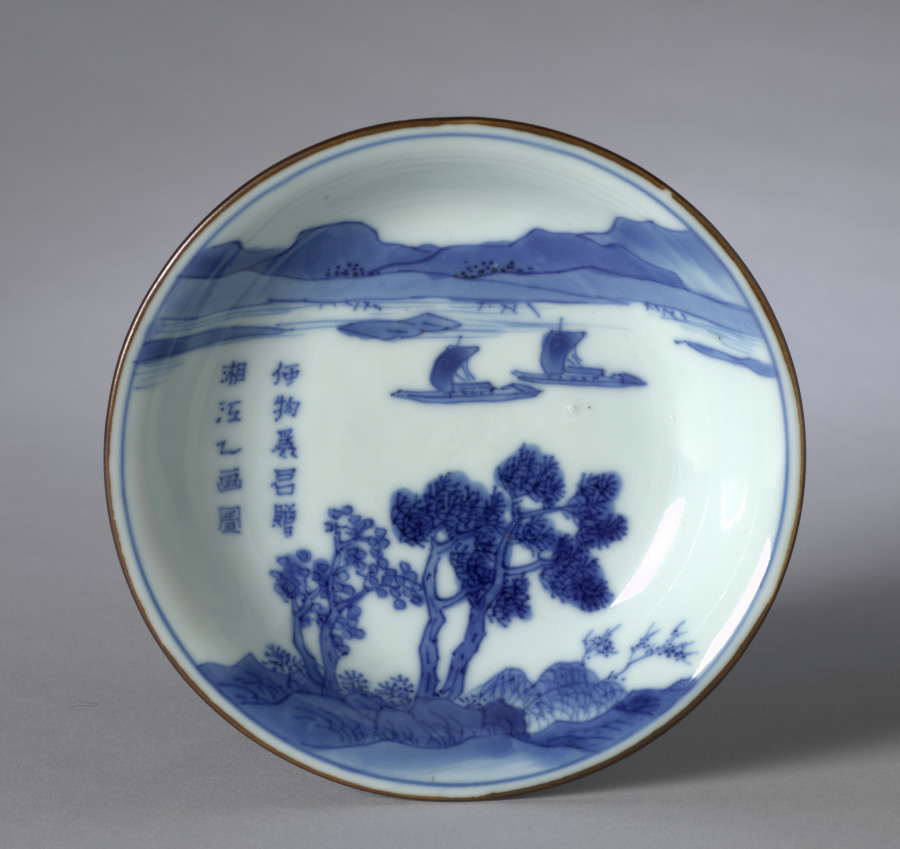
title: Dish with Landscape and Inscription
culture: China, Qing dynasty (1644-1911), Kangxi period (1662-1722)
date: 1662–1722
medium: porcelain, underglaze cobalt-blue decoration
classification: Ceramic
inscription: 何物為君贈，湘江之畫圖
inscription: 大明嘉靖年製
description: The river scene, composed of two shores divided by waterafter the Yuan dynasty master Ni Zan is inscribed: What shall I present the gentleman with? A picture of the Xiang River. A tributary of the Yangzi in Hunan province, the Xiang River is associated with Chinese literature and history, such as the Xiang goddesses, loyal consorts of emperor Shun. They are mentioned in the ancient Songs of the South (Chuci), known for staining the bamboo along the Xiang River with their tears when they thought him lost in the floods. The dish may have been a gift between two departing friends or for a couple.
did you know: There is an apocryphal inscription on the bottom of the dish.